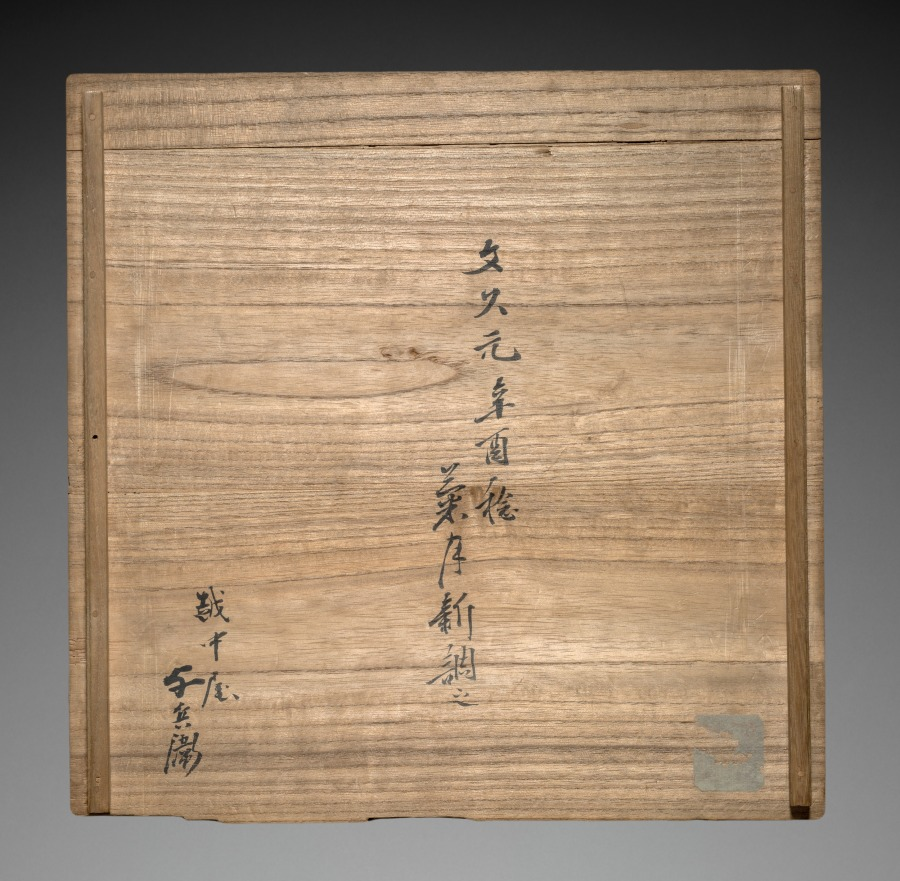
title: Plate with Bird and Flower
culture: Japan, Edo period (1615–1868)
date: mid- to late 1600s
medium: Porcelain with overglaze enamel (Hizen ware, Ko-Kutani style)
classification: Ceramic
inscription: "FUKU" in square seal under aubergine glaze.